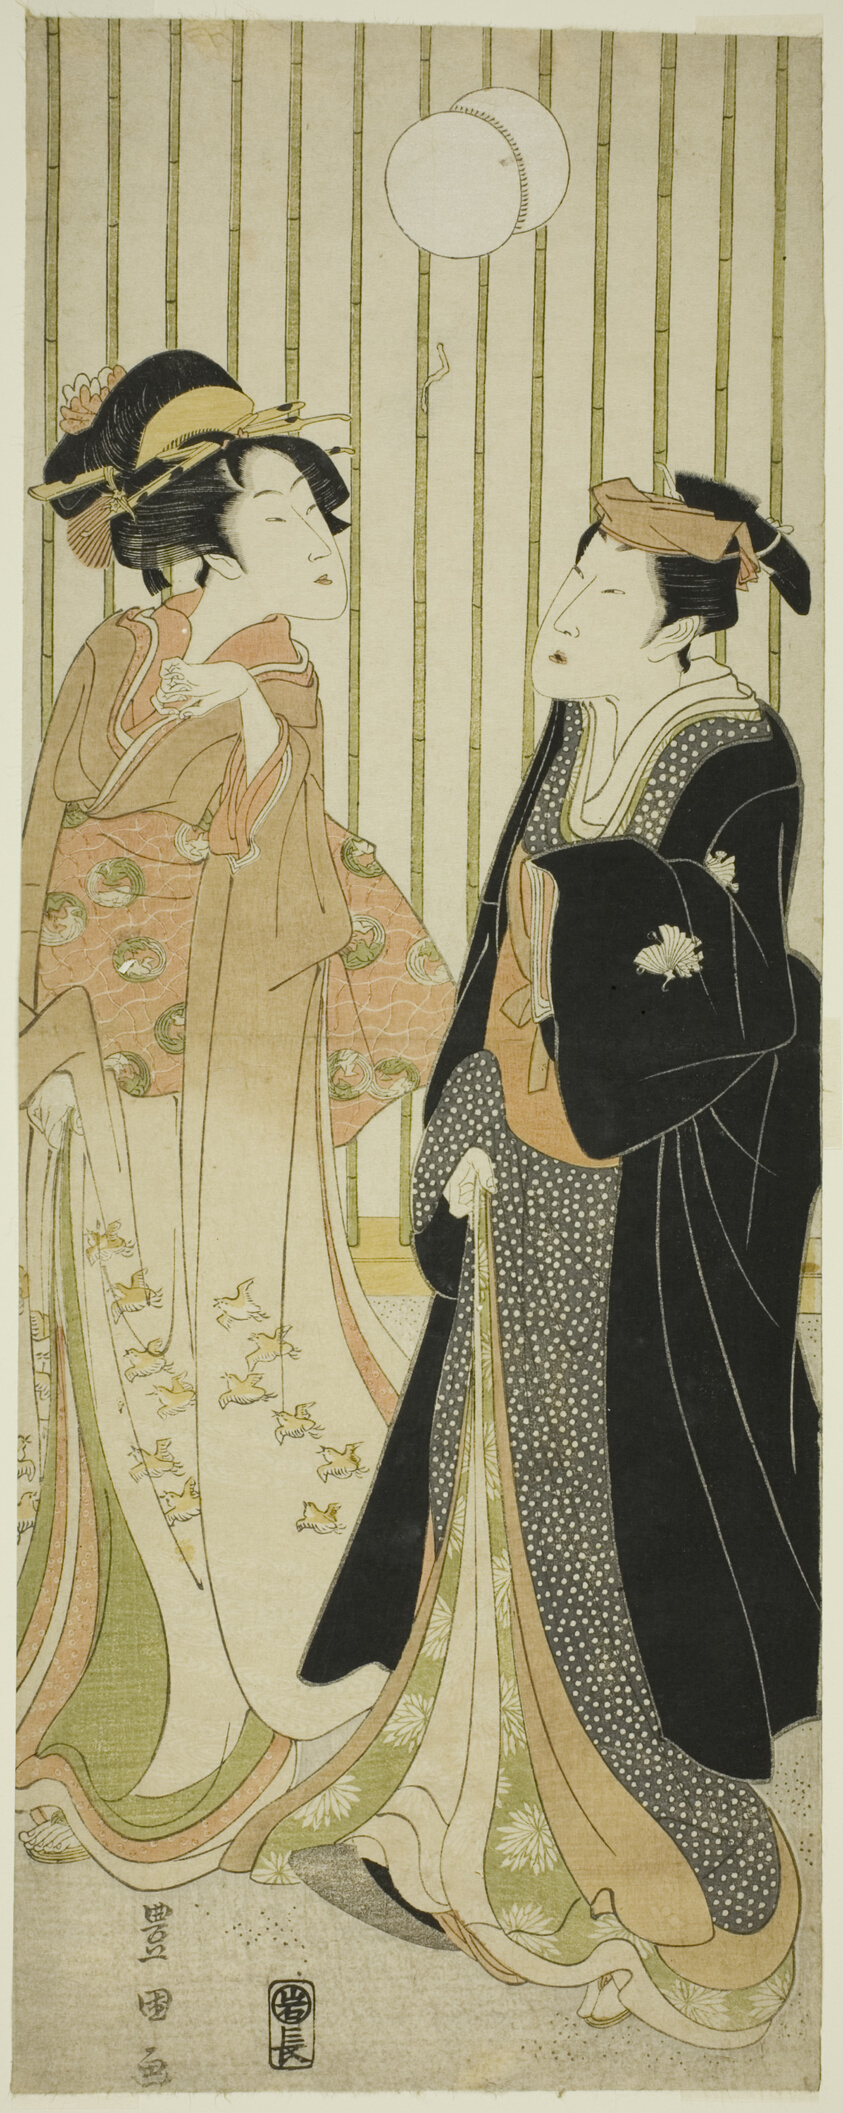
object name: Print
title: The actor Segawa Kikunojo and a young woman kicking a ball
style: Japanese (culture or style)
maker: Utagawa Toyokuni I 初代 歌川 豊国; Japanese, 1769–1825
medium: Color woodblock print; vertical naga-oban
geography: Japan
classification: woodblock print; print; asian art